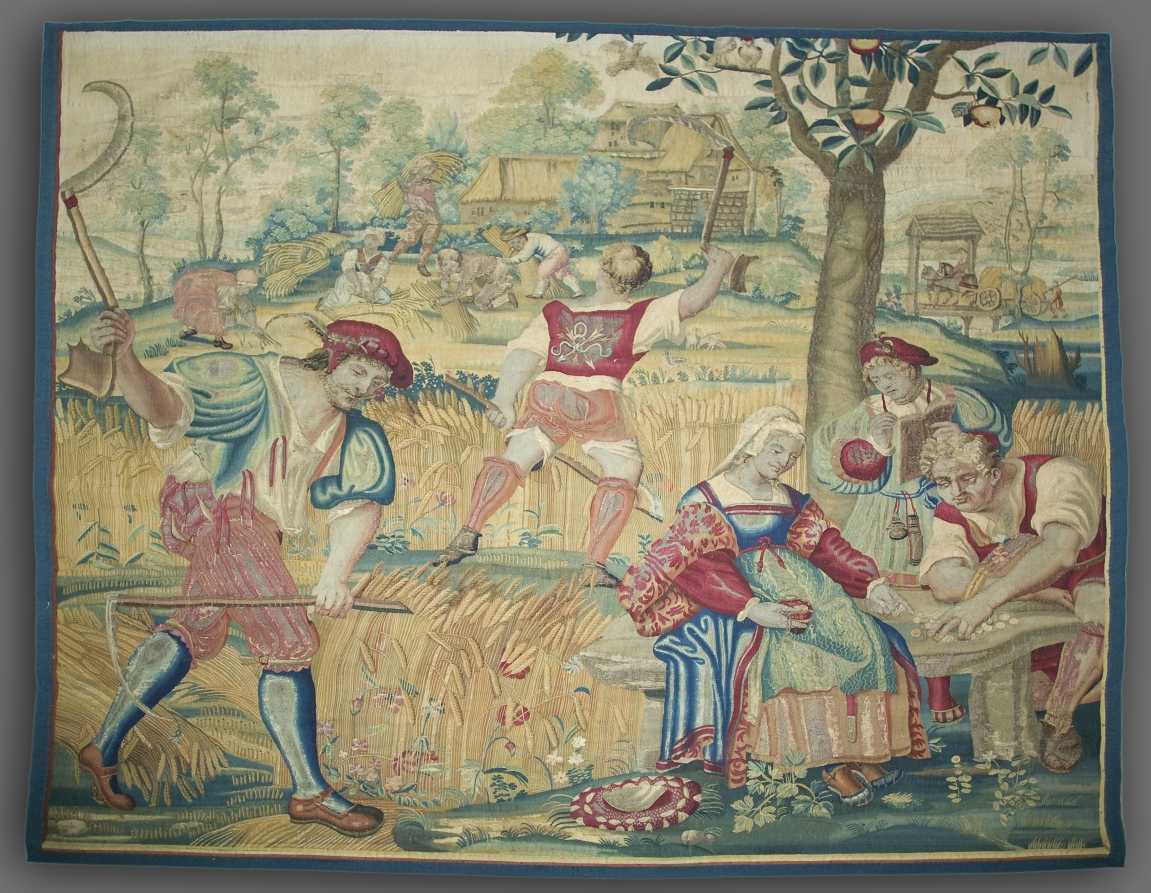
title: Summer: Harvest Scene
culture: France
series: Four Seasons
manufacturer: possibly by Gobelins Manufactory (France, Paris, est. 1662)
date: designed c. 1535, woven mid- to late 1600s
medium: Wool, silk, and gold filé: tapestry weave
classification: Tapestry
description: The wheat harvest took place in July and represented the hard, hot work of summer. The reaper in the foreground and his companion in the middle distance swing their scythes high above their heads as they prepare to cut the wheat stalks. Underneath the shade of an apple tree, three figures in the foreground are determining a price for the wheat. A woman gestures to the coins that the seated man is counting. Behind them another man holds an account book, in which he records their decisions. His pen holder and ink pot hang from his belt. In the distance to the right, two horses draw a cart piled high with wheat toward four farmers who gather bunches of wheat stalks together and tie them into bundles.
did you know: Images of the harvest provided a way to express pride in the fruitfulness and plenty of a particular region and celebrate the diligence of the field laborers.